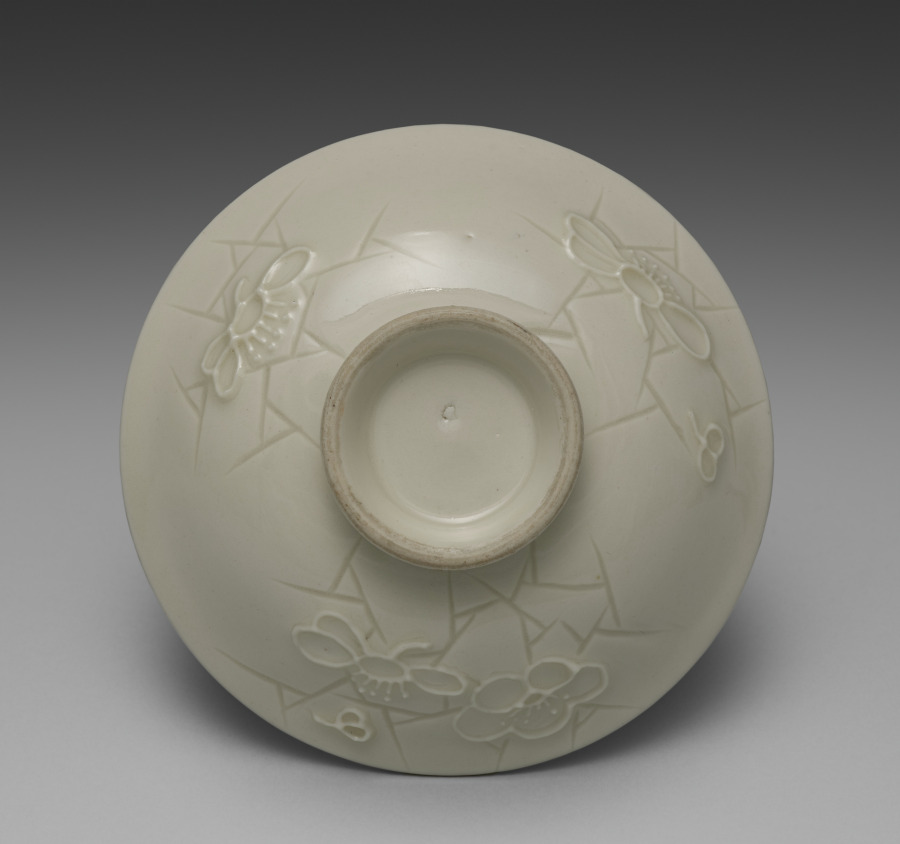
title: Cover for a Bowl from Dining Set with Plum Blossoms and Cracked-Ice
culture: Japan, Meiji period (1868–1912)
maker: Seifū Yohei II (Japanese, 1844–1878)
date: c. 1875–78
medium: Porcelain with molded designs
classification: Ceramic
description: Each item in this set has a delicate low-relief design of flowering plum branches over scattered, intersecting lines meant to resemble the cracked-ice surface of a frozen body of water and is signed on the base in gold pigment. While Yohei II produced many fine works in underglaze blue, like those produced by Kiyomizu Shichibei, he also made works in quite different styles later in his career, from the early 1870 s. In 1873, he was appointed purveyor to the Industrial Center of Kyoto Prefecture, a designation associated with Kyoto’s efforts to reach an international market through the port of Kobe; and from 1875 until his death, he was involved in national-level projects to present Japanese ceramics across the world. It was during this period that Yohei III was apprenticed to Yohei II, and it has been suggested that this set may in fact be an early example of Yohei III’s work, which he signed with his teacher’s name. Decorated with flowers resembling Japanese textile motifs, the set calls to mind the design of Yohei II’s pair of vases with plum blossoms in the Victoria and Albert Museum. Here, the elaborate trees created for a formal public exhibition setting have been translated into the approachable blossoms of the genteel domestic environment. While the designs are consistent across the pieces, each raised flower petal and pistil and each incised line in the ice was done by hand, so the cups, bowls, and dishes are similar yet unique. The bottoms of two boxes once identified the set’s owner, but the information has been deliberately obscured with black ink. However, inscriptions still visible appear to indicate two occasions, once at the end of July 1886 , and once again in June 1916 , when parts of the set were requested from Hokura in Niigata Prefecture. The location corresponds to a neighborhood in the present-day city of Jōetsu. The surname Tsuji 辻 also appears on a paper tag affixed to one of the box cloths. Future research may possibly reveal more about their provenance. A vase by Yohei III in a private collection combines the formal grandeur of the Yohei II vases in the Victoria and Albert Museum with the gentler design of this dining set, placing flowering plum trees against soft, scalloped-edge clouds resembling those in golden screens.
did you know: The dining wares have a creamy white coloration that the four boxes containing them identify as Korean in style.